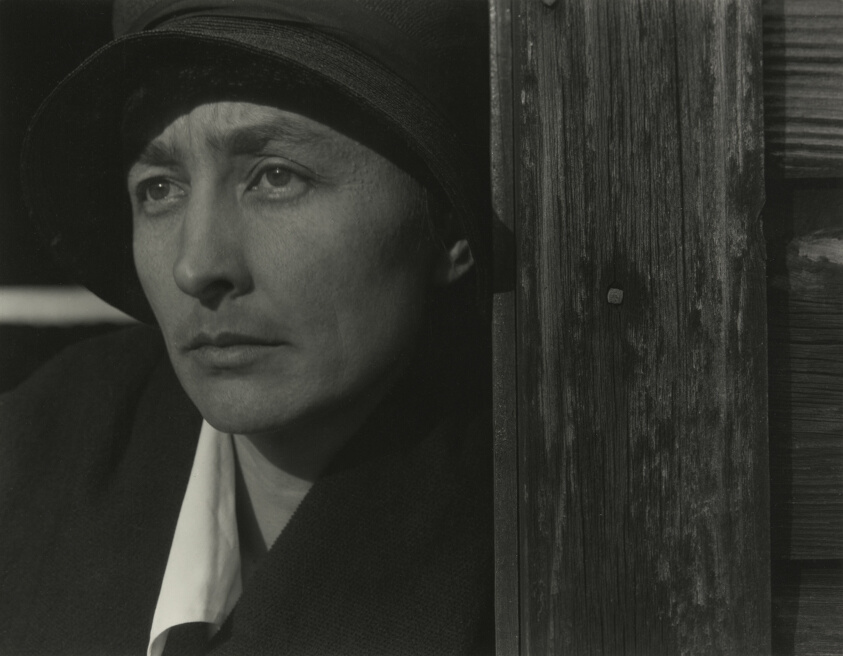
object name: Photograph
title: Georgia O'Keeffe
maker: Alfred Stieglitz (American, 1864–1946)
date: 1922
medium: Gelatin silver print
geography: United States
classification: gelatin silver (developing-out-paper) pr; photographic process; photography; photograph